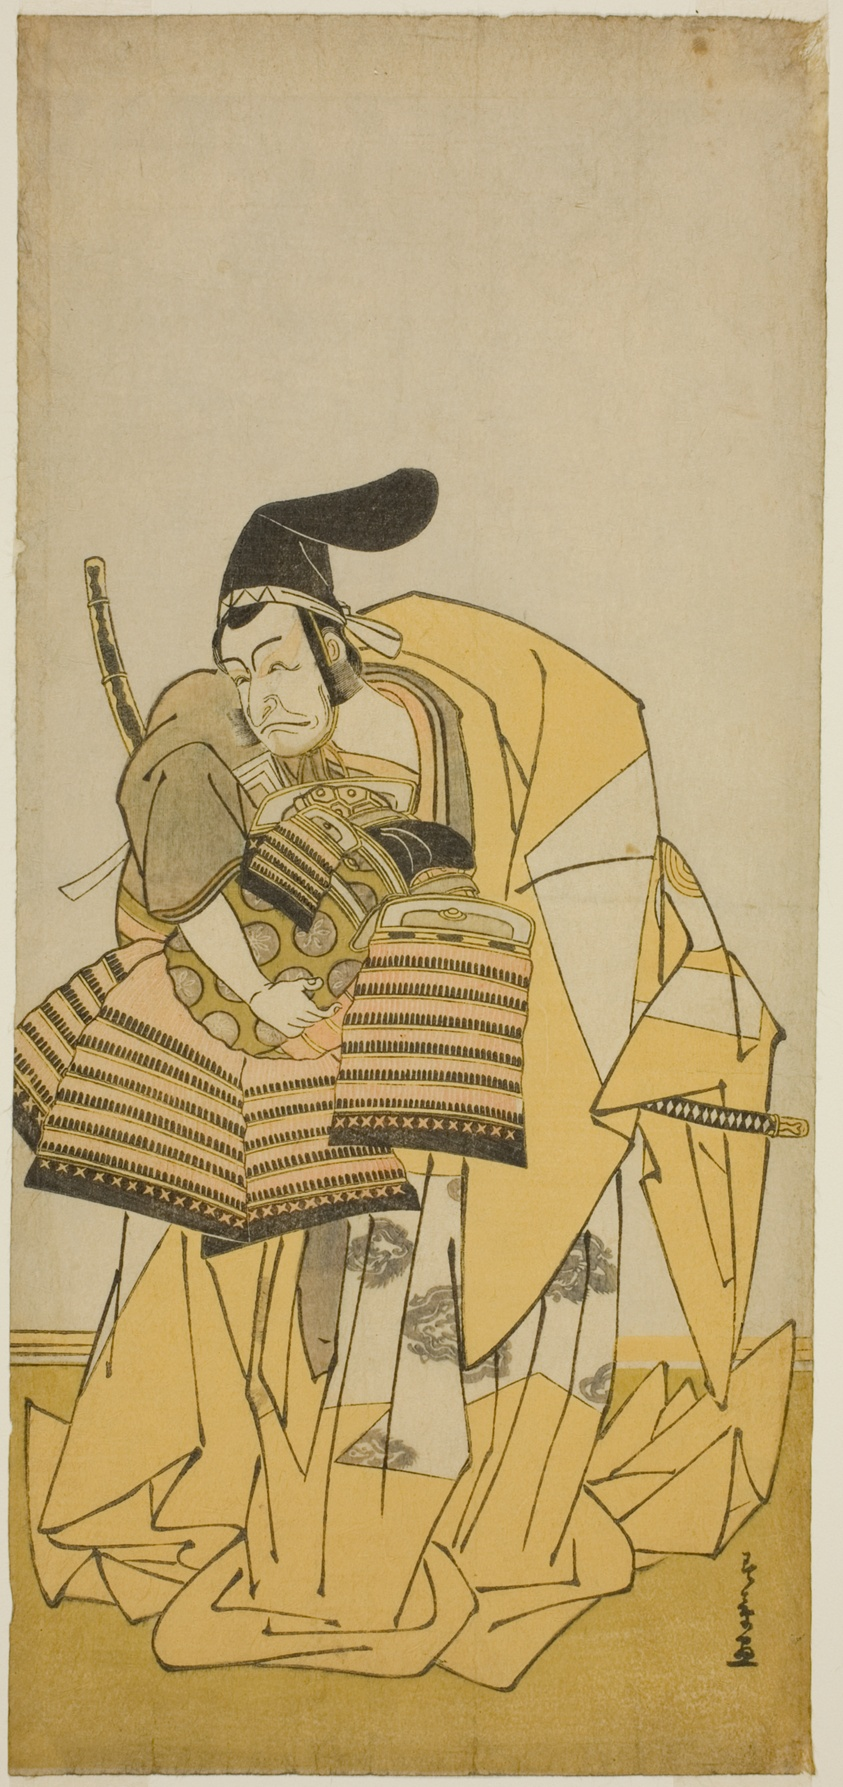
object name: Print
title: The Actor Ichikawa Ebizo III as Kudo Saemon Suketsune in the Play Kamuri Kotoba Soga no Yukari, Performed at the Ichimura Theater in the First Month, 1776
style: Japanese (culture or style)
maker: Katsukawa Shunsho 勝川 春章; Japanese, 1726-1792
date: c. 1776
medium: Color woodblock print; hosoban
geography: Japan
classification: woodblock print; print; asian art